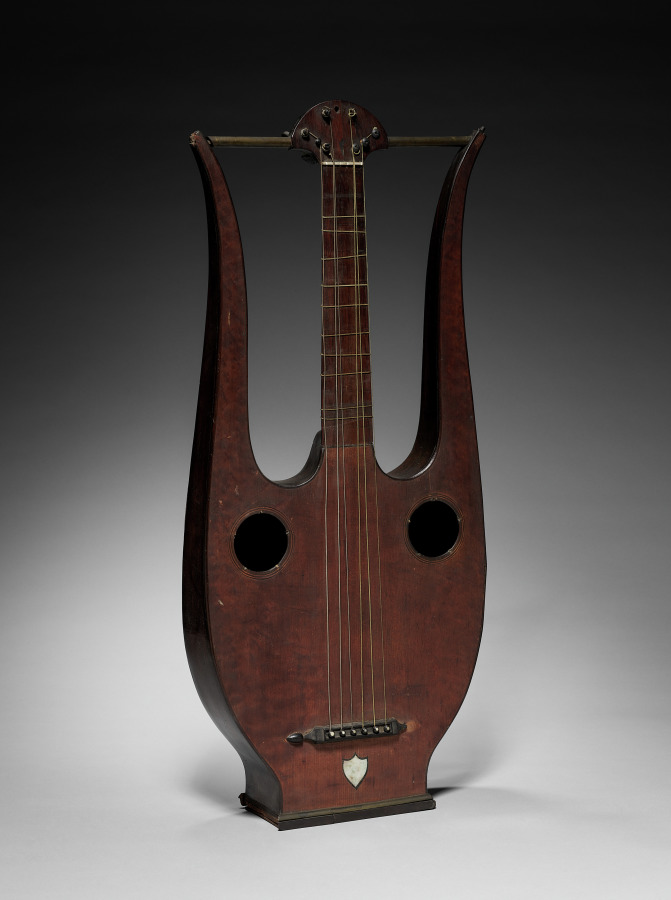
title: Lyre Guitar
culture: Italy, late 17th century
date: late 1600s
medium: wood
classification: Musical Instrument